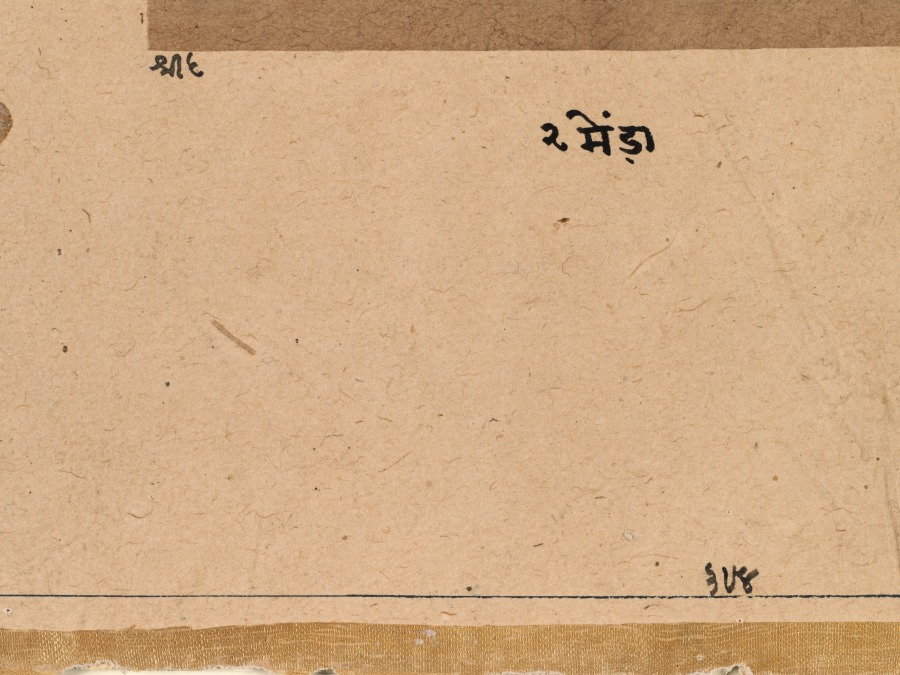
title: A royal ram with a gold chain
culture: India, Mughal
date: c. 1585; border added probably 1700s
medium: Gum tempera and gold on paper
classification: Painting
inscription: Urdu inscription at top, in nasta‘liq script: sheep; Hindi inscription under left corner of painting, in devanagari script: Shri 6; Hindi inscription below painting, in devanagari script: 2, sheep; Hindi inscription, bottom center, in devanagari script: 674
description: The ram in this painting is a particularly well-groomed animal that was probably kept in the royal menagerie and attended to by special keepers. The puffs of hair on the ram’s back have been colored with henna, and he wears a decorative chain of bells across his chest. The Mughal rulers collected and exhibited specimens of various animals from their territories out of a scientific interest as well as a desire to display the extent of their influence over the land and its inhabitants.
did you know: Sheep with black and white markings like this are called Jacob sheep.